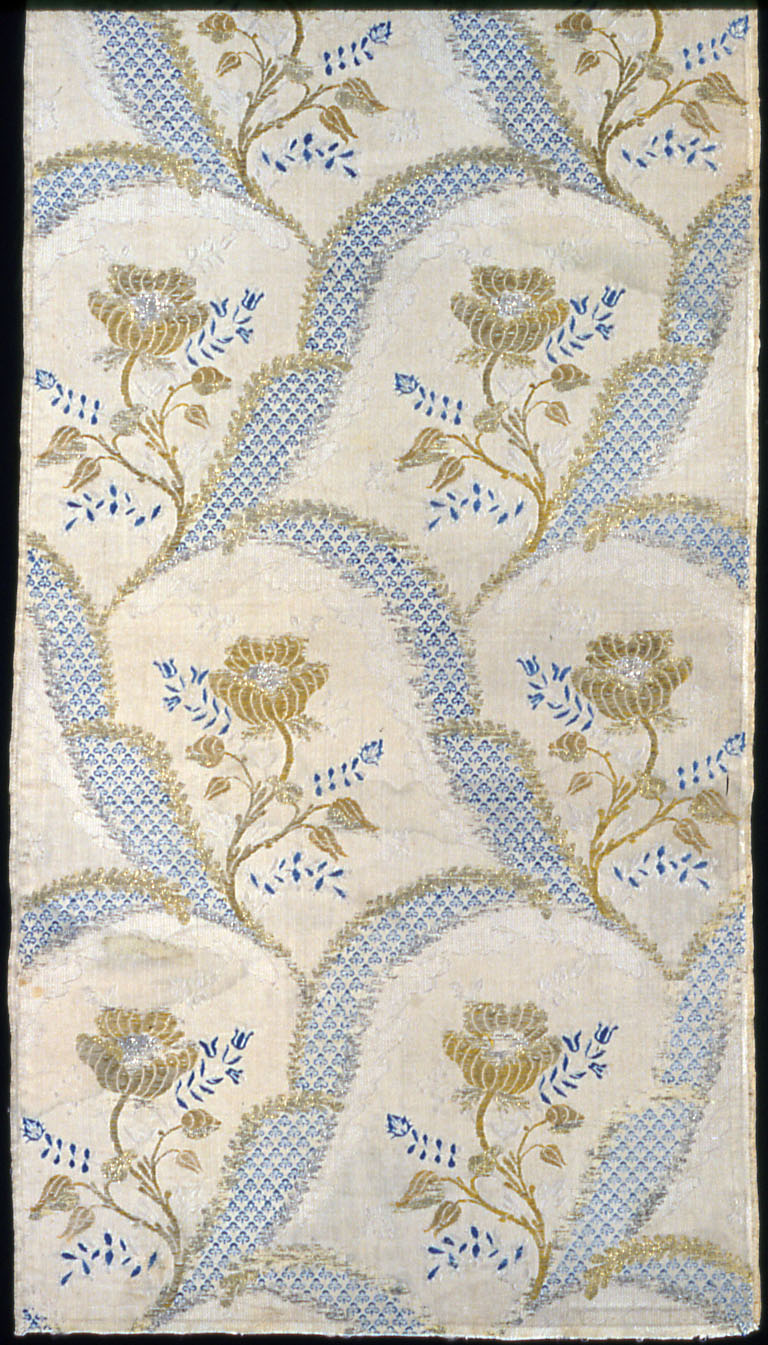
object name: Textile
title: Panel (Intended as Dress Fabric)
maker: France, Lyon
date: 1760s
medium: Silk, gilt-and-silvered-metal strips and gilt-metal-strip-wrapped silk, plain weave with supplementary patterning wefts and supplementary brocading wefts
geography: France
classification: textile; weaving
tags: flowers